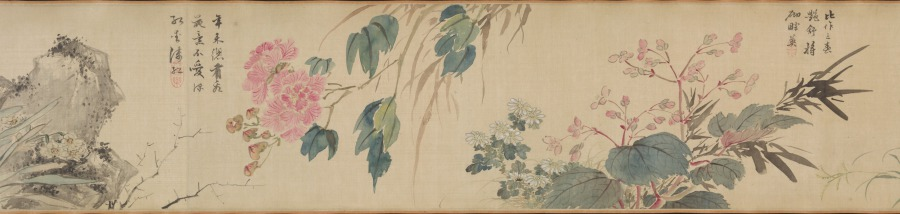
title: Flowers of Four Seasons, with Poems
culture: China, Ming dynasty (1368–1644)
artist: Wang Guxiang (Chinese, 1501–1568)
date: 1531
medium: handscroll; ink and light color on silk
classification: Painting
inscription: Artist's inscription, signature, and 15 seals. Ink Orchids. Sewn as pendants for the man of worth, swaying quiety, fragrance in the valley. [seal] Hsiao-chu ts'un Peony. Wiping his face, the young gentleman Ho [Ho Yen of Wei, Three Kingdoms] appears to have been powdered. His previous life was the perfume-stealing Han Shou [of Chin, 265–419 CE], the fragrance still lingers. [seal] Ts'un-wu chai. Flowering Crab Apple, New Bamboo. Shao-lin [Du Fu, 712–770] had to put down his brush. [Flowering Crab Apple]. Yü-k'o [Wen T'ung, d. 1079) in vain wrote poems about [Bamboo]. [seal] Yu-shih. Lotus Flowers. When she turns her head, half-hidden by a fan, and casts a glance, all the beautiful women become colorless. [seal] K'ang yüeh huai. Loquat. Ripeness in summer. [seal] Lu-chih. Pomegranate Flower. Whenever I remember you I will send my thoughts, but where have you gone--the [skirt] of pomegranate red? [seal] Wu-ho Sheng. Day Lily. Plant the day lily to forget sorrow. [seal] Yu-shih. Chrysanthemum. The untrammelled joy at the eastern fence. [seal] Lu-chih. Begonia. Comparing it to the beauties of Spring, and spreading them out as trimming for the stone steps. [seal] Yu-shih. Hibiscus. In recent years I have always enjoyed looking at flowers; instead of dark red I preferred pink ones. [seal] Jen-sheng i-lou. Narcissus, Camellia. The jade girdle left behind at Lo River. [Narcissus]. The precious pearls glitter before Spring. [Camellia]. [seal] Lu-chih. Heavenly Bamboo (Nandina domestica). A single branch in the wintry season. [seal] K'ang yüeh huai. Plum. Fragrant snow in the Lo-fou Mountains. [seal] Ts'un-wu chai. In the eleventh lunar month of the hsin-mao year of the Jiaqing era [1531], [I] imitated the boneless style of Yüan masters in sketching from life. Guxiang [seals] Yu-shih; Lu-chih. Translated by Wai-kam Ho/Lingyun Shih Liu (1980)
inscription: 2 colophons and 23 additional seals: 1 colophon dated 1632, and 2 seals of Li Jih-hua [Li Rihua] 李日華 (1565–1635); 1 colophon and 2 seals of Xiang Shengmo 項聖謨 (1597–1658); 3 seals of Liang Qingbiao 梁清標 (1620–1691); 6 seals of the Jiaqing 嘉慶 emperor (r. 1796–1820); 9 seals of Ch'eng Ch'i [Cheng Qi] 程琦 (1911–1988)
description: In this painting, flowers are loosely arranged by the seasons: narcissus and peony represent early spring; yellow loquat and lotus, summer; chrysanthemum, autumn; and the plum and evergreen bamboo, winter. The artist added to each flower a poetic line of calligraphy associating each plant with a historic or legendary figure. For example, the chrysanthemum, along with the line “The untrammeled joy at the eastern fence,” refers to the poet Tao Yuanming (died AD 427) who enjoyed chrysanthemums at the eastern fence in his garden. The scroll illustrates Wang Guxiang’s mastery of free brushwork, combining light monochrome ink with transparent colors. In his inscription, Wang says he used the “boneless” style without outlines as developed during the Yuan dynasty (1279–1368). Wang was a native of Changzhou, a city in southeast China known for its rich flora and fauna, and flower-and-bird painting tradition.